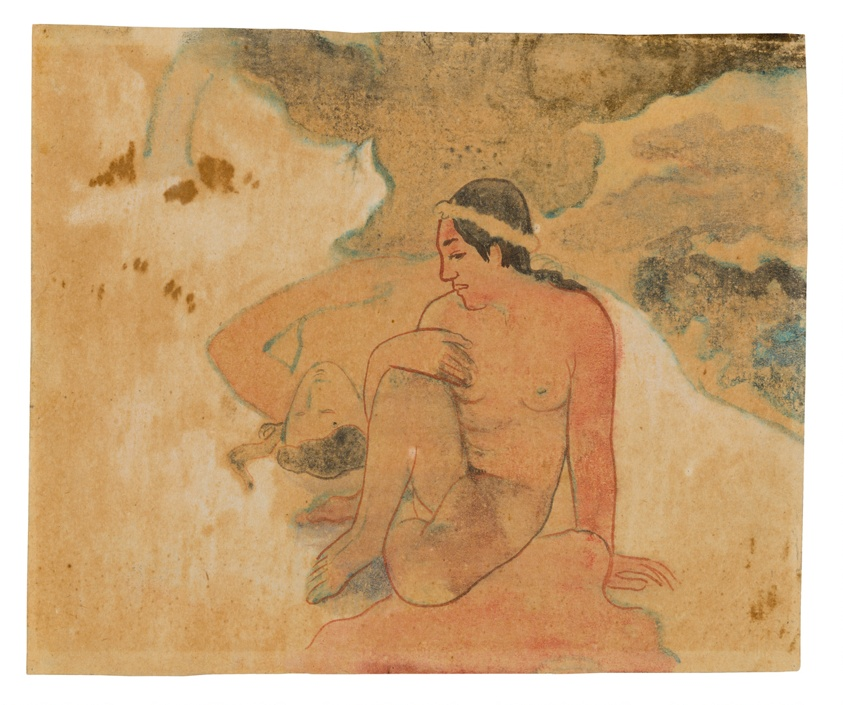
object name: Drawing and Watercolor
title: Aha oe feii? (What! Are You Jealous?)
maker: Paul Gauguin (French, 1848-1903)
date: 1894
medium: Watercolor monotype from a glass matrix, with brush and white gouache, reddish-brown and black water color, on cream wove paper (an imitation Japanese vellum)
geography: France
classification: watercolor; monotype; drawings (visual works); prints and drawing